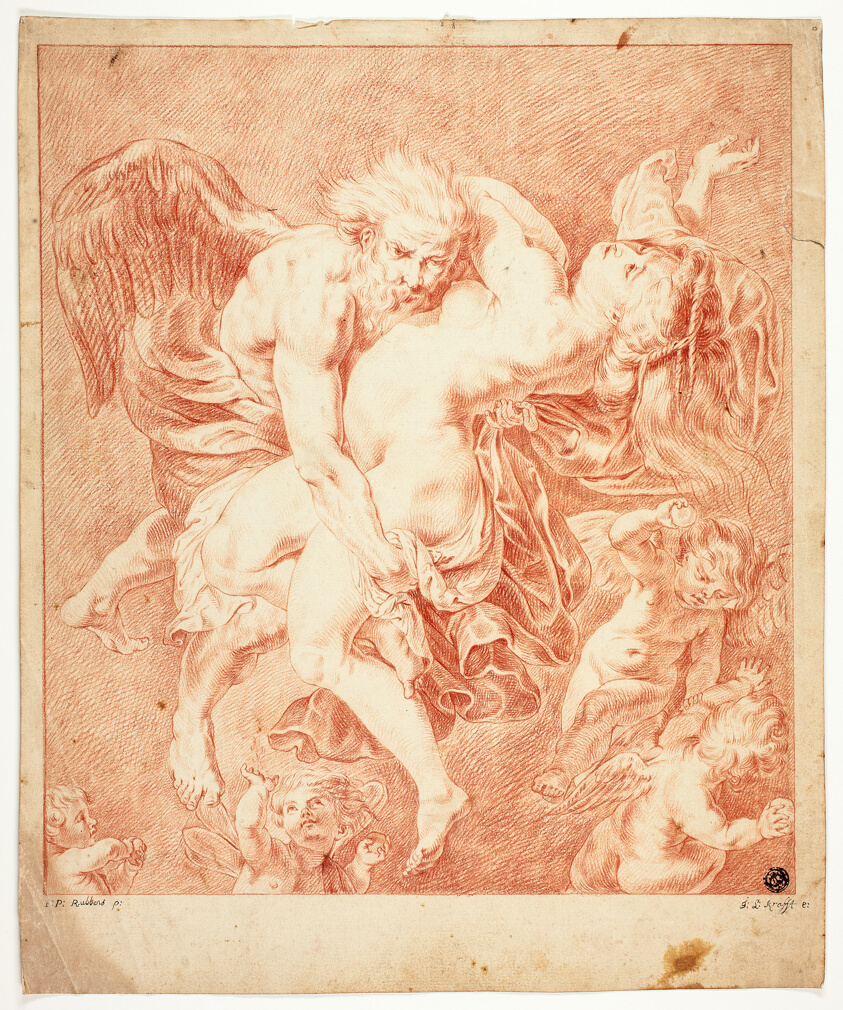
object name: Drawing and Watercolor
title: Boreas and Orytheia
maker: Jan Lauwryn Krafft (Flemish, 1694-after 1765); or after Peter Paul Rubens (Flemish, 1577-1640)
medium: Red chalk on ivory laid paper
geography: Flanders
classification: chalk; drawings (visual works); prints and drawing